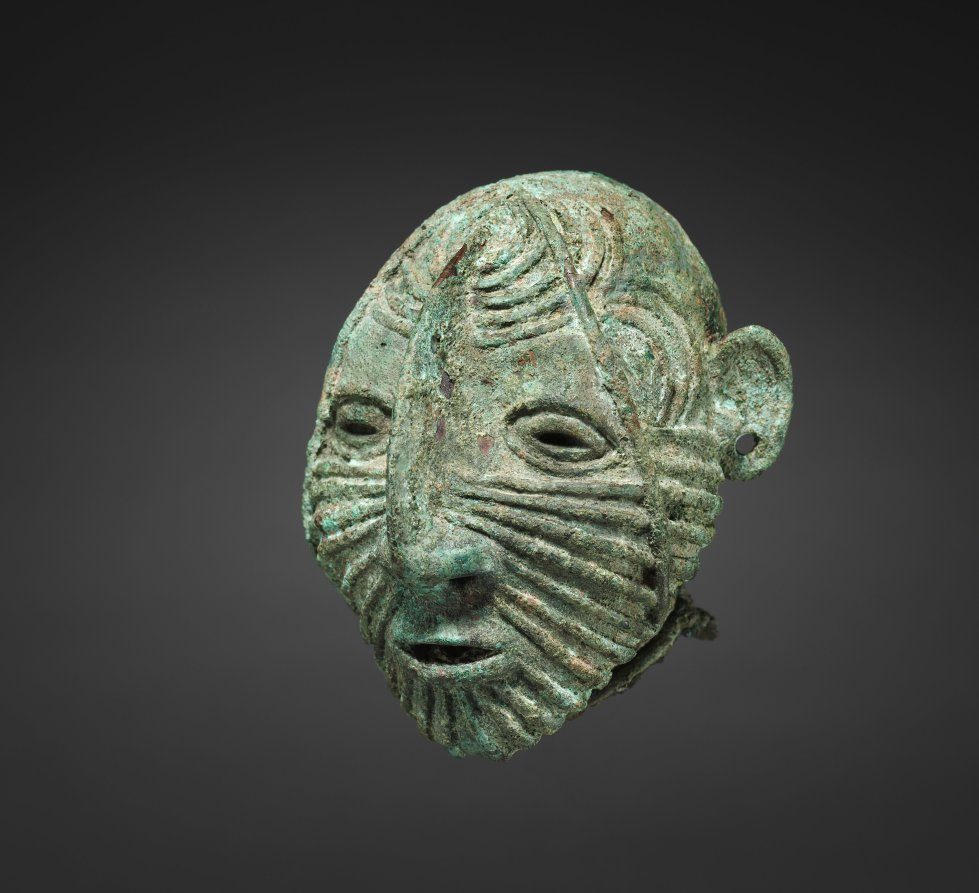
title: Male Head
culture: South East Asia, Thailand, Ban Chiang, Neolithic period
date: c. 1000 BCE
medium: bronze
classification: Sculpture